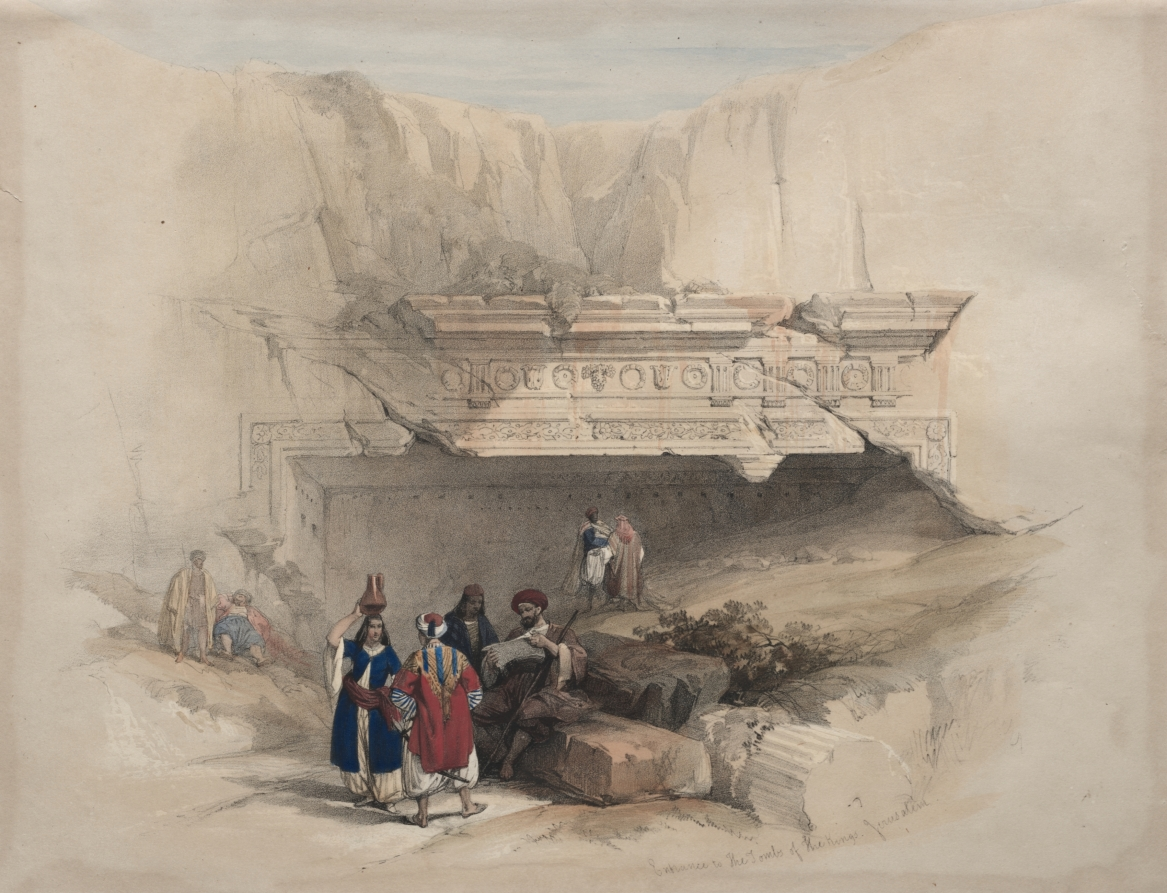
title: Entrance to the Tombs of the Kings, Jerusalem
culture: England, 19th century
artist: David Roberts (Scottish, 1796–1864)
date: 1839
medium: color lithograph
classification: Print